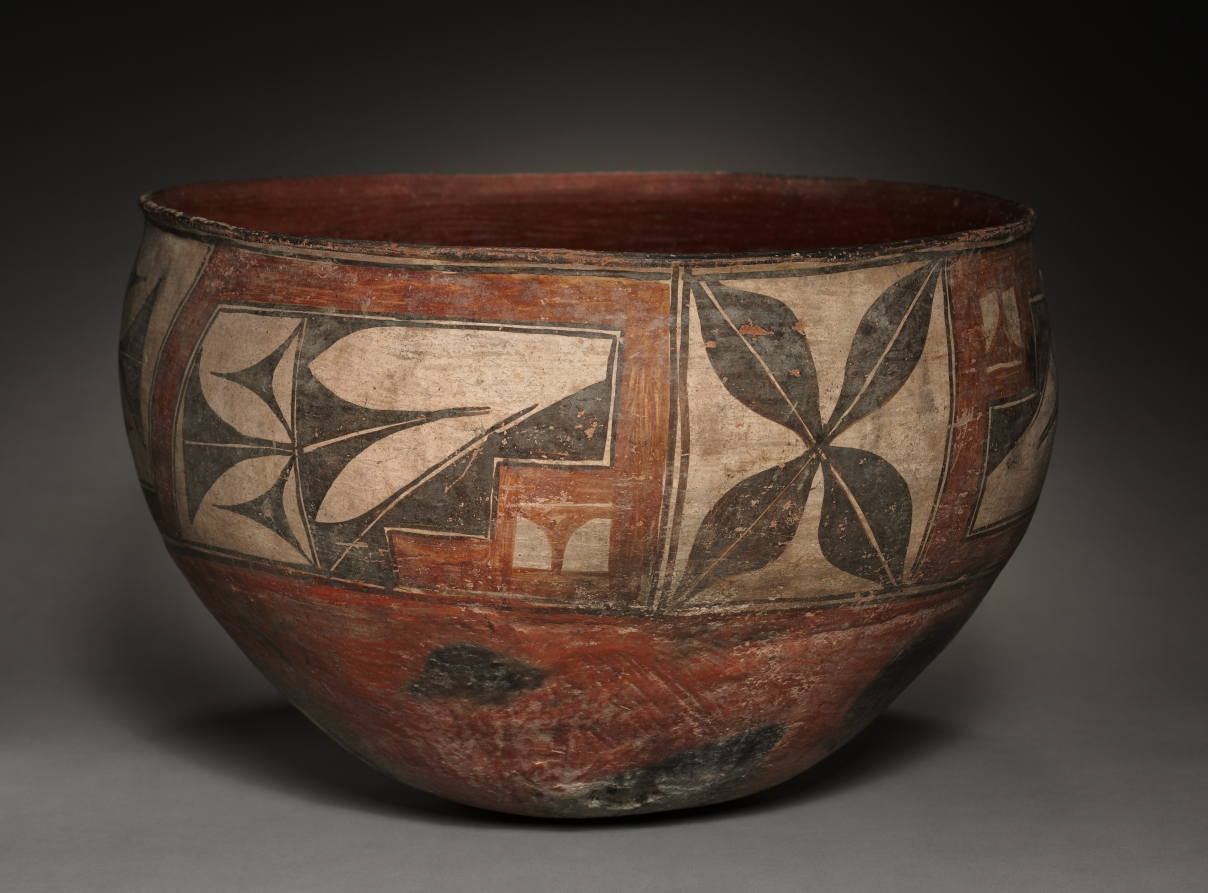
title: Dough Bowl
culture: Southwest,Pueblo, Zia, Post-Contact Period,19th century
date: 1890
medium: ceramic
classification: Ceramic